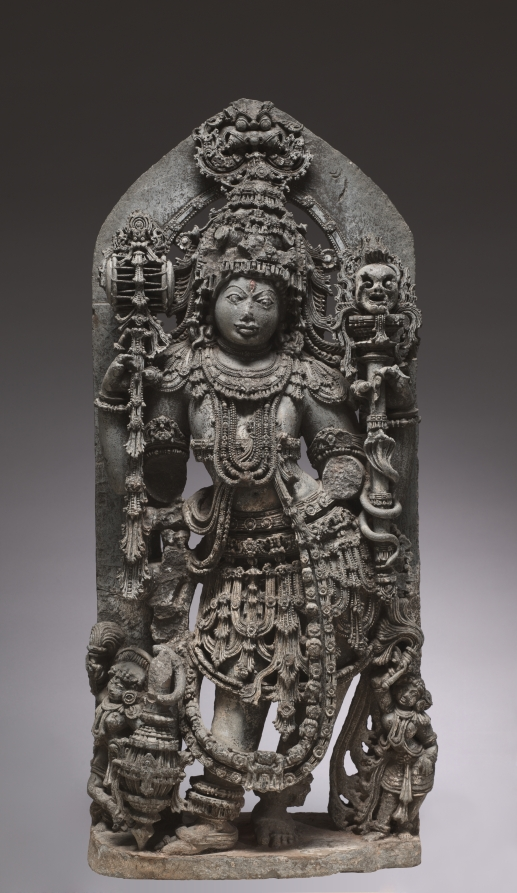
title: A Guardian of Shiva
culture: Southwestern India, Karnataka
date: 1200s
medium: Chloritic schist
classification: Sculpture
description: Guardians at Shiva temples sometimes appear as a form of the deity himself. Carved in the ornate style favored by kings of the Hoyshala dynasty (1026–1343), this four-armed figure holds a drum that indicates the ongoing passage of time in his upper right hand. In his upper left hand, he holds a staff surmounted by a decomposing head of the god of creation, Brahma. The soft contours of the face, complete with third eye of knowledge, temper his ferocity and create a gently alluring figure.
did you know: A three-hooded cobra winds its way up the shaft, while another slithers through the sockets of the skull.